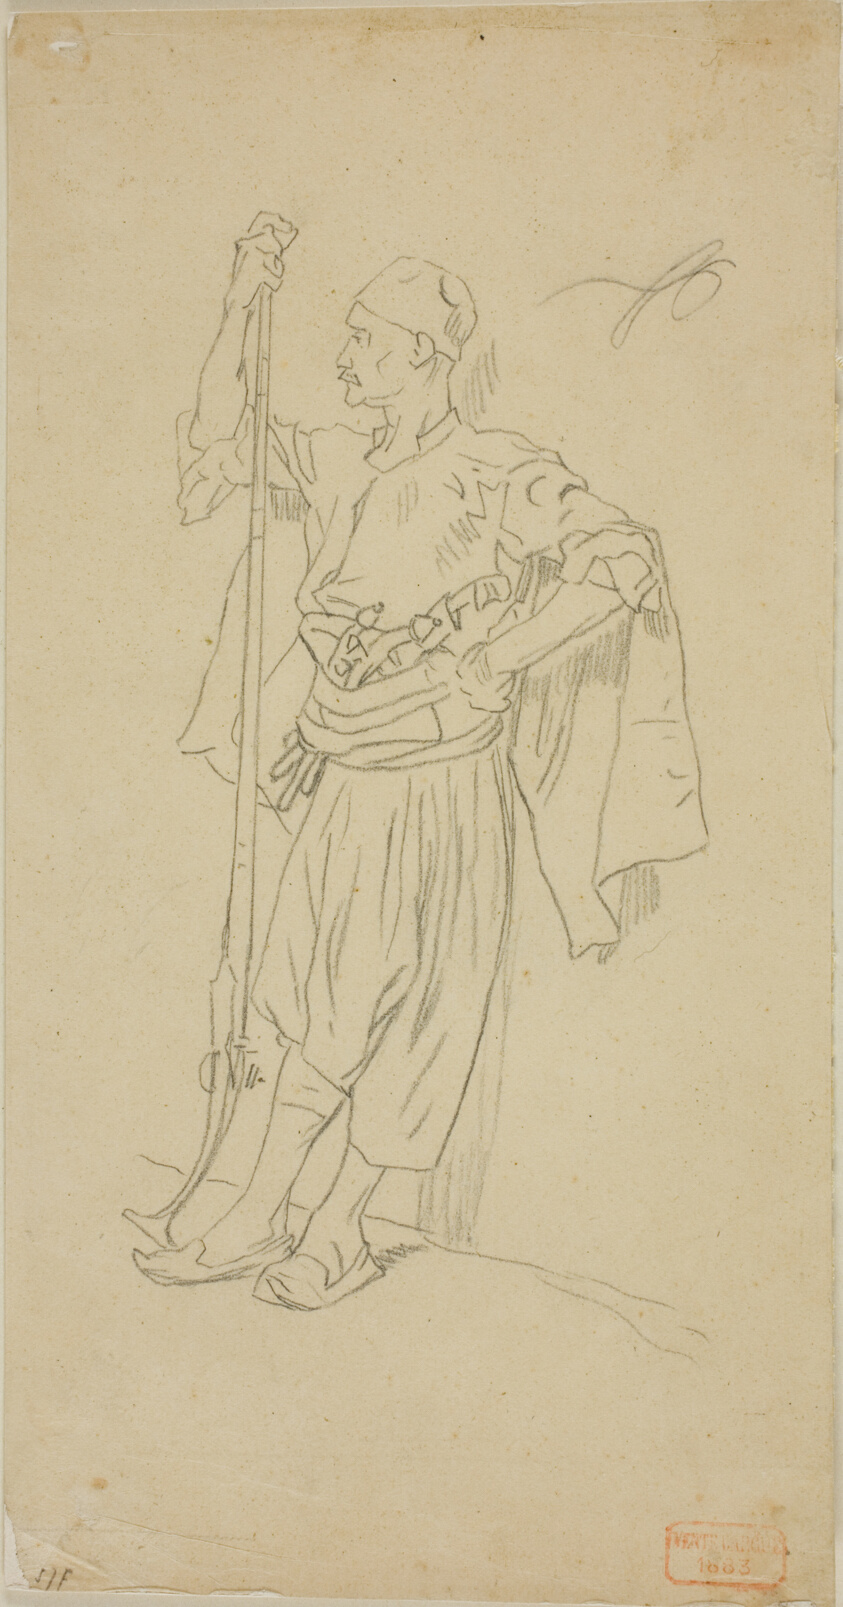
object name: Drawing and Watercolor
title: Armed Arab Leaning Against a Wall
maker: Charles Bargue (French, 1826-1883)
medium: Graphite on buff wove paper, laid down on ivory wove paper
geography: France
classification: graphite; drawings (visual works); prints and drawing